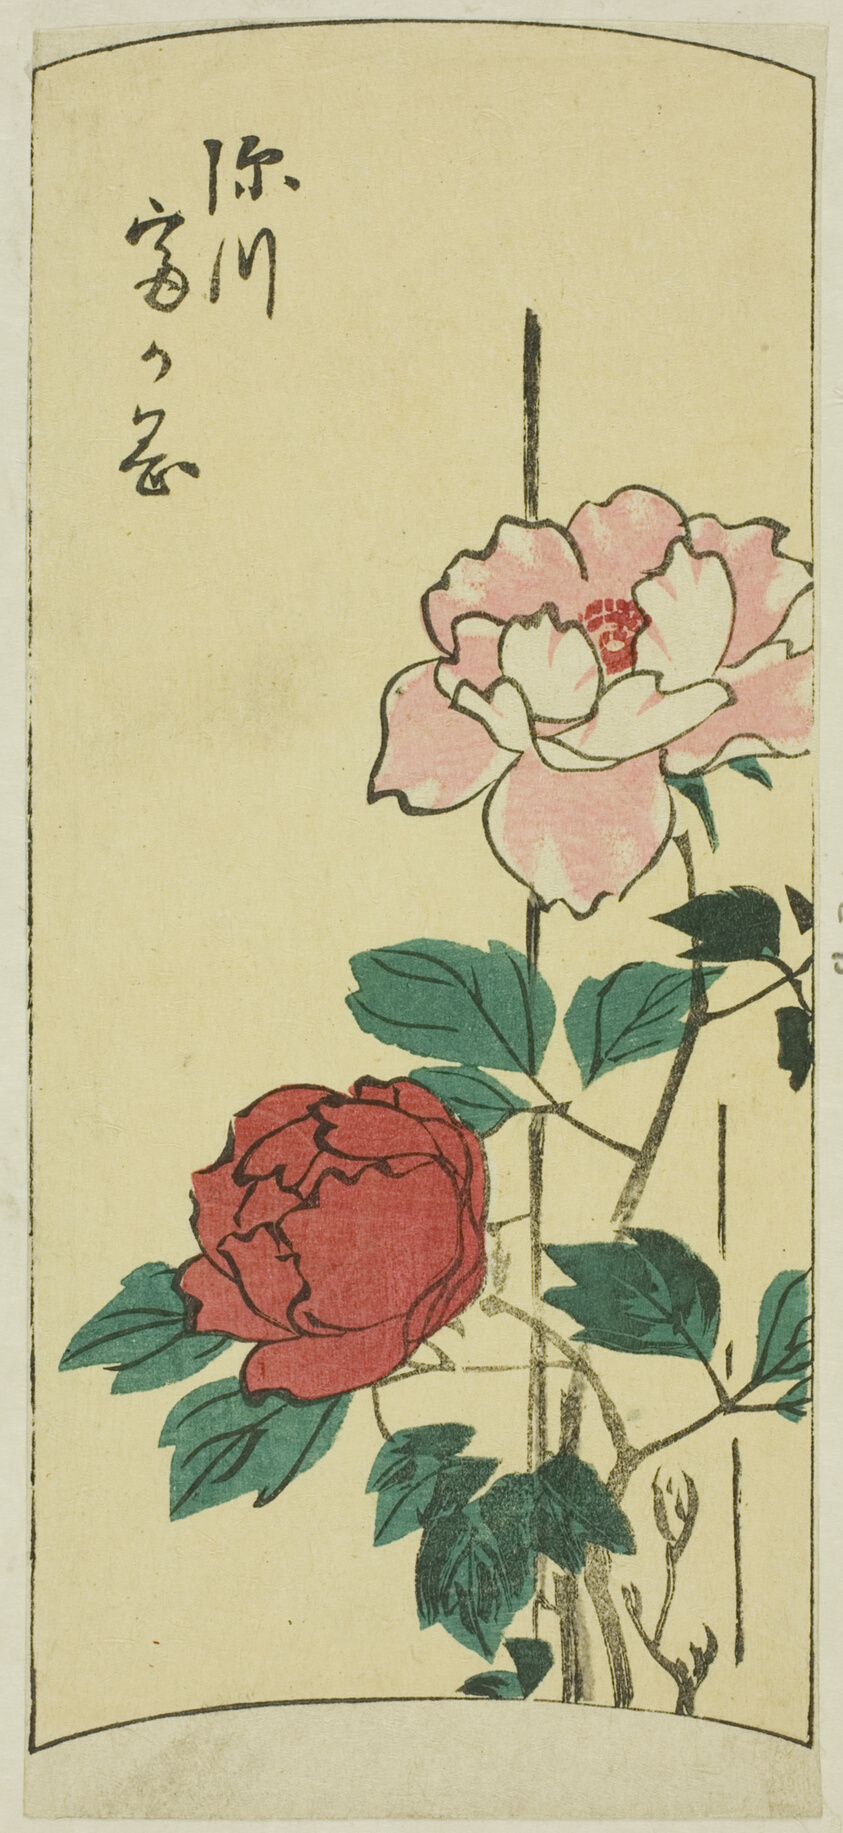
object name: Print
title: Fukagawa Tomigaoka, section of a sheet from the series "Cutouts of Famous Places in Edo (Harimaze Koto meisho)"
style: Japanese (culture or style)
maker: Utagawa Hiroshige 歌川 広重; Japanese, 1797-1858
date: 1852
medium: Color woodblock print; section of harimaze sheet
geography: Japan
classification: woodblock print; print; asian art